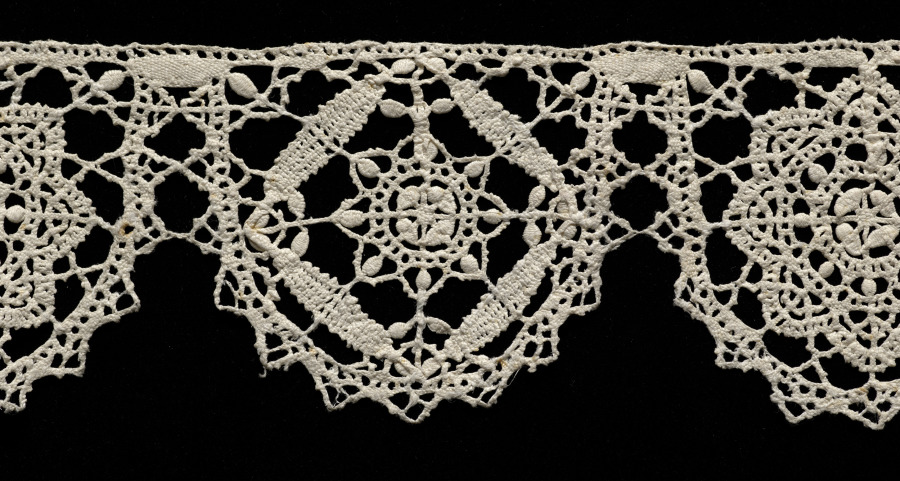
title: Lace Edging of Points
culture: Italy, Genoa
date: 1600s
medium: Bobbin lace (rose lace)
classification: Lace